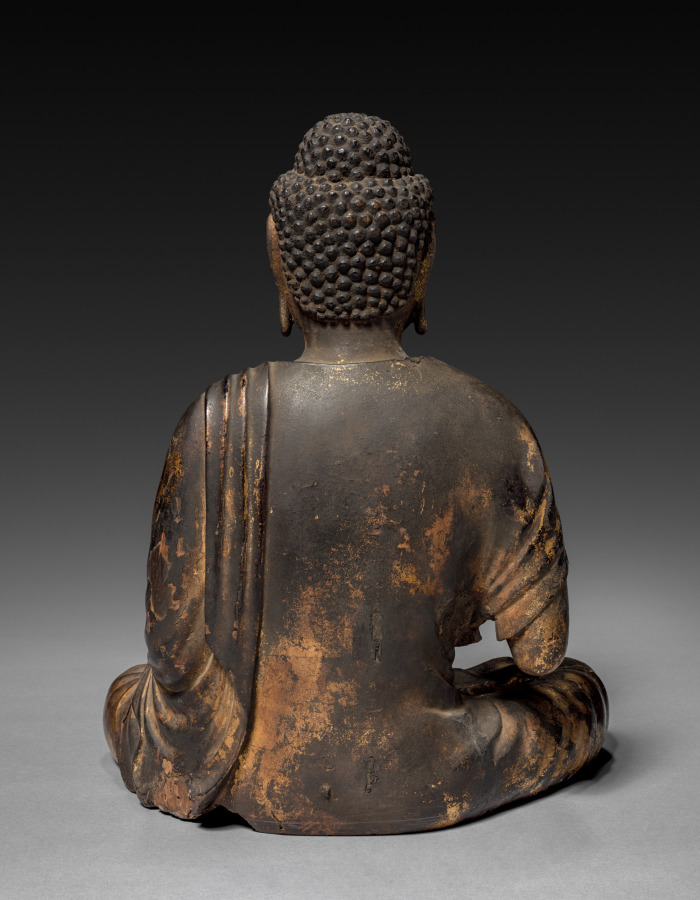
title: Shakyamuni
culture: Japan, Meiji period (1868–1912)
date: c. 1868–1912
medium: Wood with traces of lacquer and gilding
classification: Sculpture